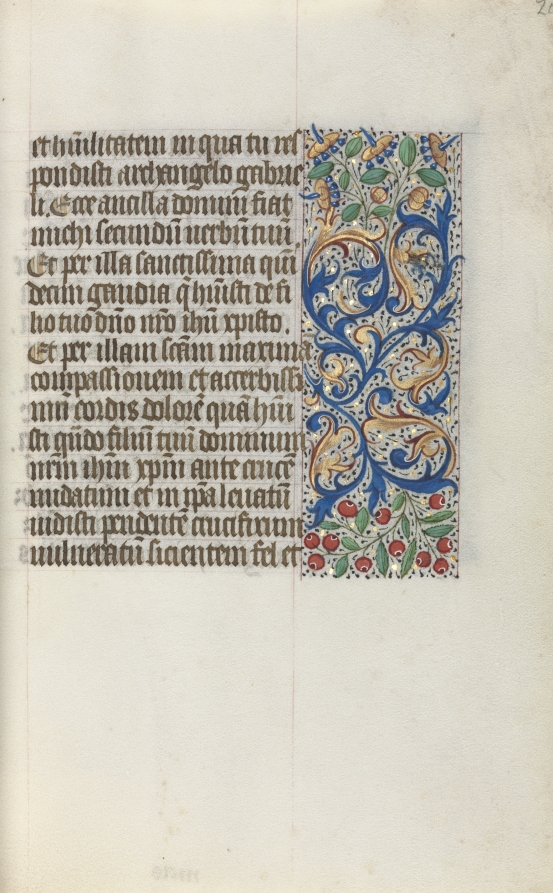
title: Book of Hours (Use of Rouen): fol. 20r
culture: France, Rouen, 15th century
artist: Master of the Geneva Latini (French, active Rouen, 1460–80)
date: c. 1470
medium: ink, tempera, and gold on vellum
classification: Bound Volume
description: In the late 1400s and early 1500s Rouen was an established and important center of book production. The city’s cathedral had a wealthy chapter that spent large sums of money to commission books and to maintain its extensive library. The stationers and booksellers would have likely been concentrated in or near the cathedral precinct. This artist, named after a manuscript now in Geneva, was Rouen’s principal illuminator during the second half of the 1400s.